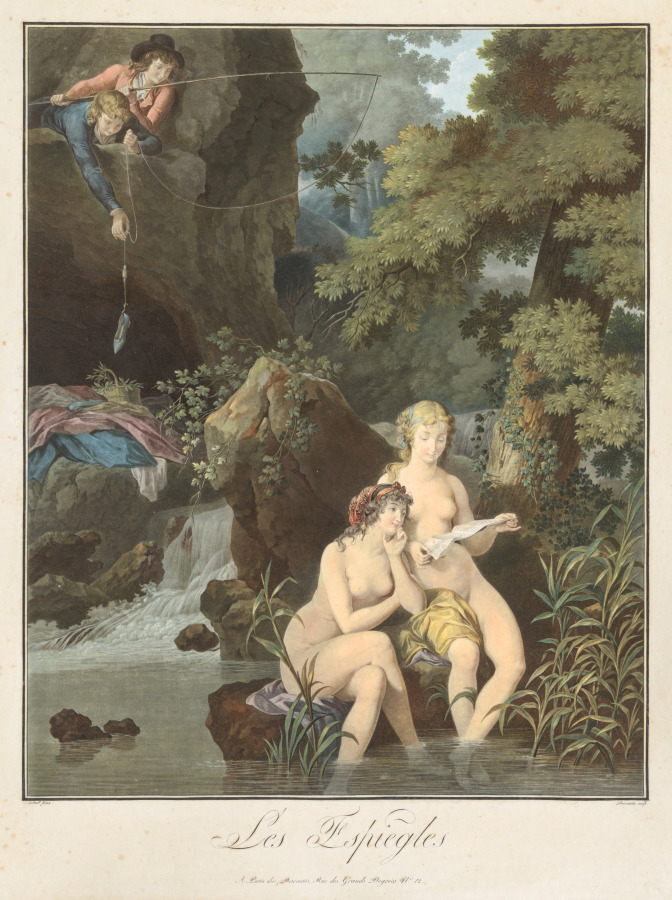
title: The Pranksters (Les Espiègles)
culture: France, 18th century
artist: Charles-Melchior Descourtis (French, 1753–1820)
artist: after Frédéric Schall (French, 1752–1825)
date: c. 1798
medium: Wash manner etching and engraving printed in blue, red, yellow, and black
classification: Print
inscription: In plate, below image: Schall pinx. Descourtis sculp. A Paris, chez Descourtis, Rue des Grands Degrés No. 12.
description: This meticulously crafted color print reproduces an oil painting by Jean-Frédéric Schall, an artist best known for his pastoral and mildly erotic scenes.During the French Revolution (1789–99), the market for deluxe color prints declined, as titillating subjects and signs of luxury were considered immoral. When attitudes relaxed around 1800, printmakers like Descourtis made a few color prints using multiple plates to layer tinted inks as they had before the Revolution. However, this time-consuming and expensive process was soon replaced by hand coloring that workers could more cheaply and easily accomplish.